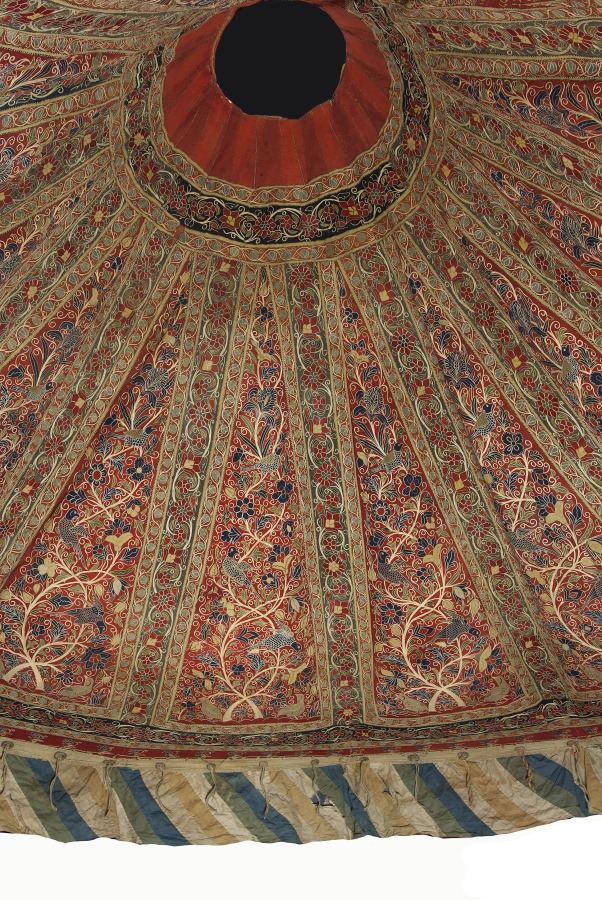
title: Royal Round Tent made for Muhammad Shah (Roof)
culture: Iran, Rasht, Qajar period (1779-1925)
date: 1834–48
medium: Interior: wool: plain weave, inlaid work; silk: embroidery, chain stitch; tape, leather; Exterior: cotton, wool: plain weave; rope, iron ring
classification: Textile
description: Royal tents were potent symbols of authority, wealth, and power throughout the greater Middle East. Rulers owned thousands of tents. They were used for shelter, shade, and innumerable functions in tent compounds that were essential for imperial ceremonies, travel, and military campaigns. Distinguished by size with elaborately decorated interior walls and ceilings, tents could be as large as castles. Opulent tents were also presented as imperial gifts. Tents are only known through documents before 1600. For example, in Baghdad in 809, Caliph Harun al-Rashid owned 4,000 ceremonial tents and 150,000 camping tents that were stored in the imperial Abbasid treasury. An astonishing variety and quantity of tents were housed in the royal Fatimid tent storeroom in Cairo in 1068-69, including "military tents, fortress tents, and castle tents, manufactured of . . . gold-brocaded stuff embroidered with designs of elephants, wild beasts, horses, peacocks, birds." Since 1600, Ottoman Turkish tents with elaborate floral decoration have been preserved in Istanbul in the Topkapi Palace Museum and Military Museum, and in European collections as war booty, primarily from the Ottoman Turks' attempt to conquer Vienna in 1683. These tents are not done in the Rasht technique, but rather are applique. In contrast, royal tents from Iran are extremely rare. This spectacular ceremonial tent is embroidered with the name of its owner, Muhammad Shah, who ruled Iran from 1834 to 1848 during the Qajar dynasty. The radiant jewellike interior features exuberant flora, blossoming vines, and robust birds made with colored wool embellished with silk-thread embroidery.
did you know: Rasht work is named after the city on the Caspian Sea in present-day Iran, which was a major silk trade center with numerous textile workshops.